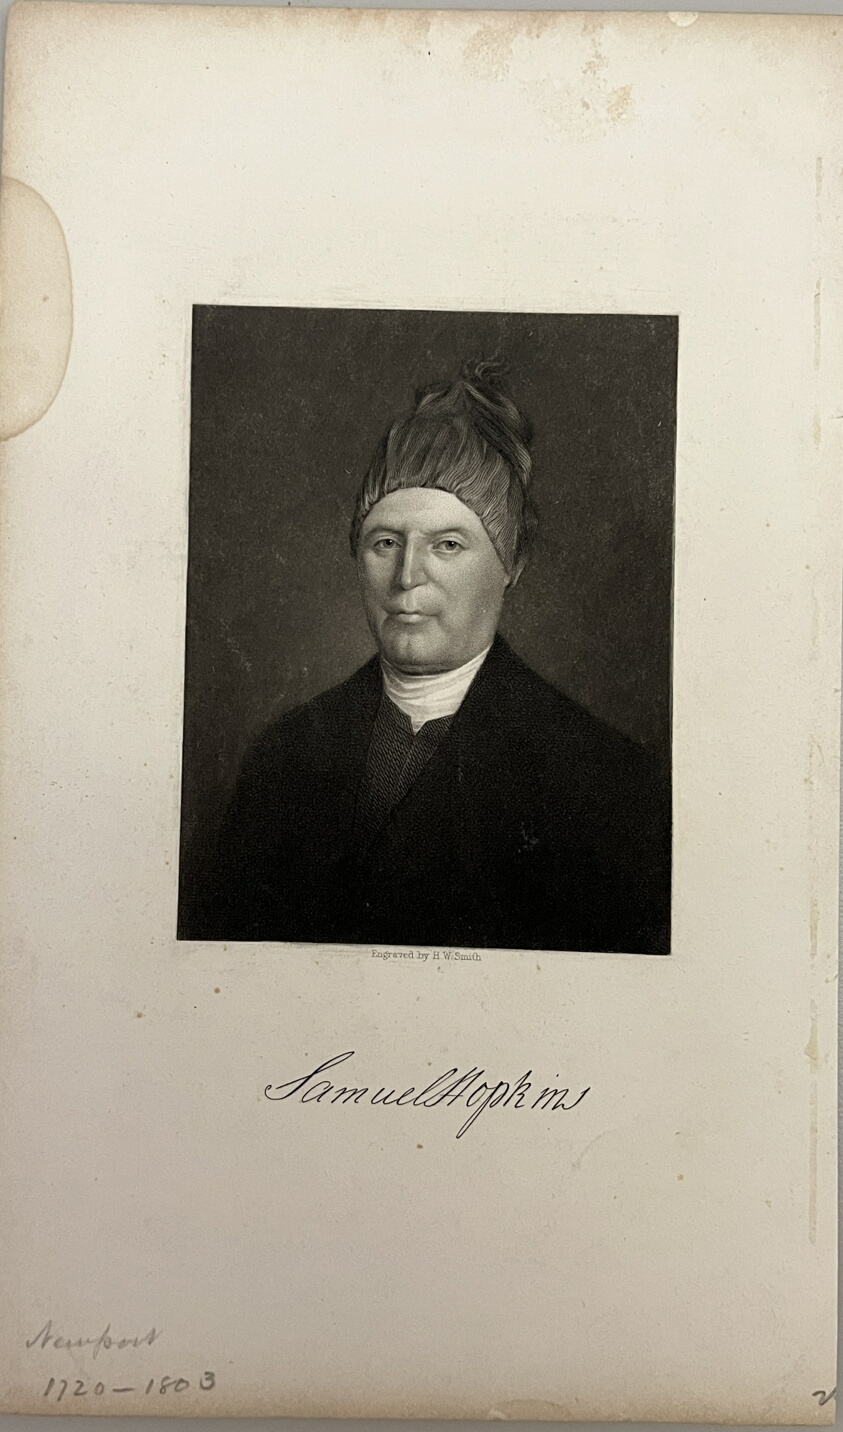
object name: Print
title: Samuel Hopkins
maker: Hezekiah Wright Smith (American, born 1828, active 1870-1879)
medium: Stiple engraving and mezzotint on paper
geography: United States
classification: reproduction; print; prints and drawing